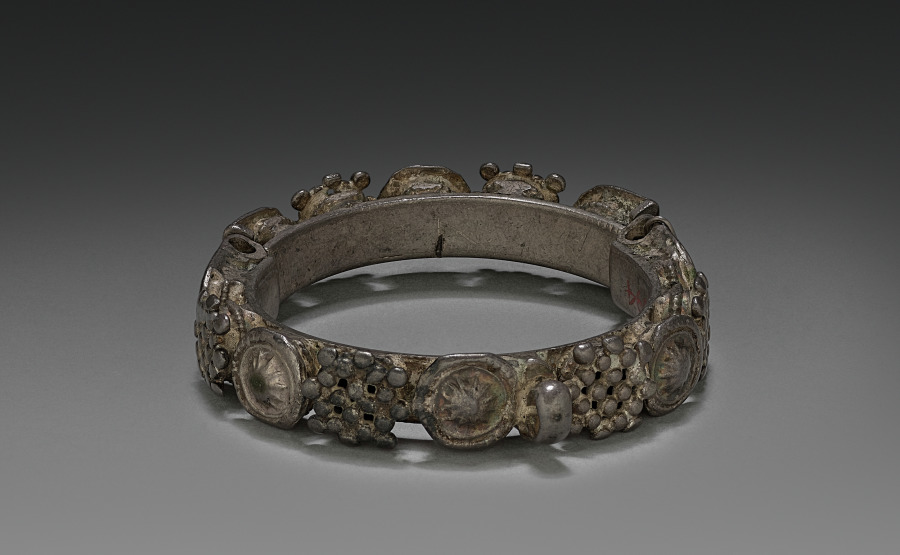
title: Bracelet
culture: India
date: 1800s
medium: silver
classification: Jewelry